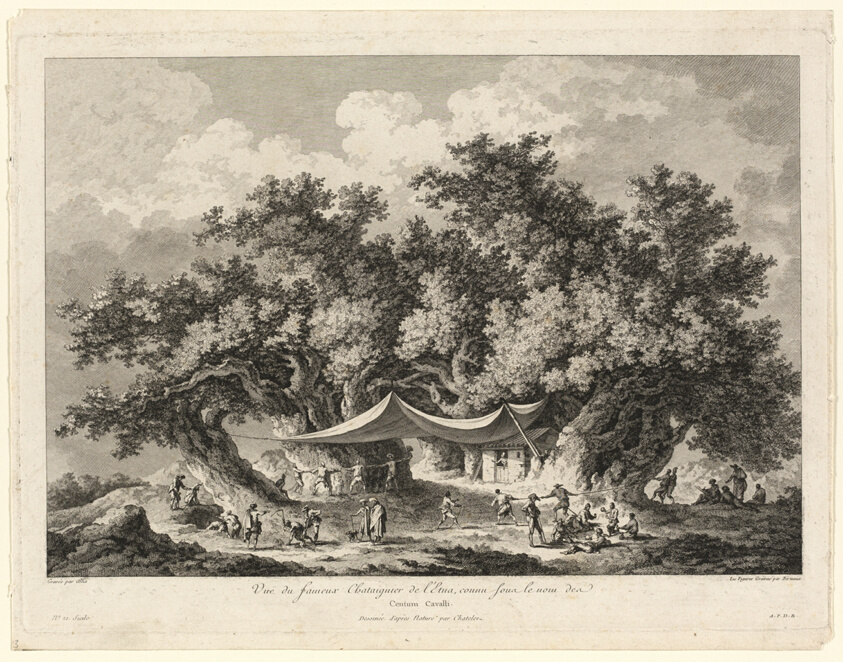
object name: Print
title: View of the Famous Chestnut Tree of Mount Etna, called Centum Cavalli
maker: François Alix (French, 1753-1794); figures by H. G. Bertaux (French, 1750-1799); after Claude-Louis Chatelet (French, 1753-1795)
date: 1784/86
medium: Etching and engraving in black on ivory laid paper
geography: France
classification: etching; print; prints and drawing